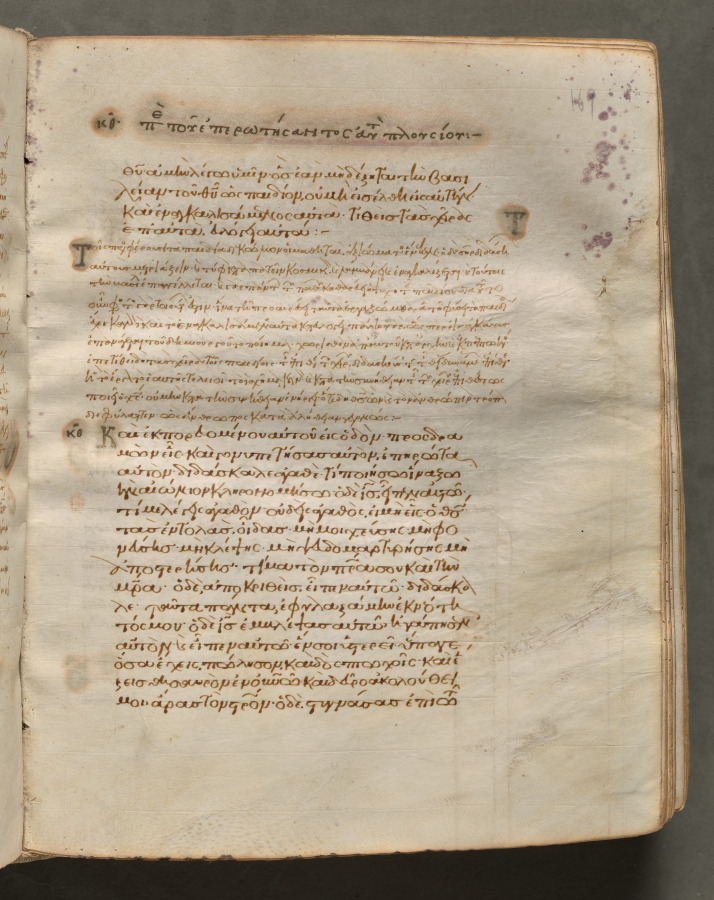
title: Text, folio 169 (recto), from a Gospel Book with Commentaries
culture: Byzantium, Constantinople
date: c. 1000–1100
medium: ink, tempera, and gold on vellum; leather binding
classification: Bound Volume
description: Each of the four gospels in this book opens on a page with brilliantly illuminated borders depicting the author of the text as well as birds-principally peacocks, symbols of the immortality of the soul-and fountains, representing the fountain of life and the salvation of the soul. This volume consists of 428 leaves with texts in Greek. Its level of sophistication suggests that it was probably written and decorated in a monastery in Constantinople.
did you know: Gospel Books were carried in procession through Byzantine churches.